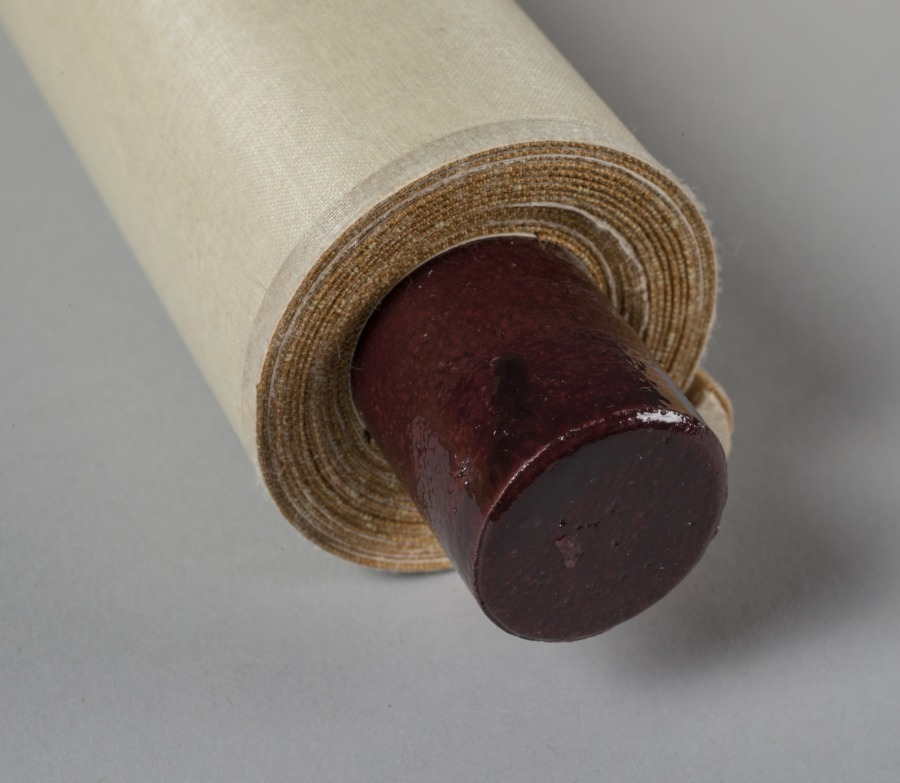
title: Genre Figures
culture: Japan, Edo period (1615–1868)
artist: Takebe Sōchō (Japanese, 1760–1814)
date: c. 1816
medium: hanging scroll; ink and color on paper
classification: Painting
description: Though rarely mentioned in official histories, Sōchō was an accomplished painter whose talent is readily apparent to the modern eye. For his compositions he chose traditional Japanese stories or everyday events. This scroll is part of a triptych of paintings converted from the folding screen format into the hanging scroll format.